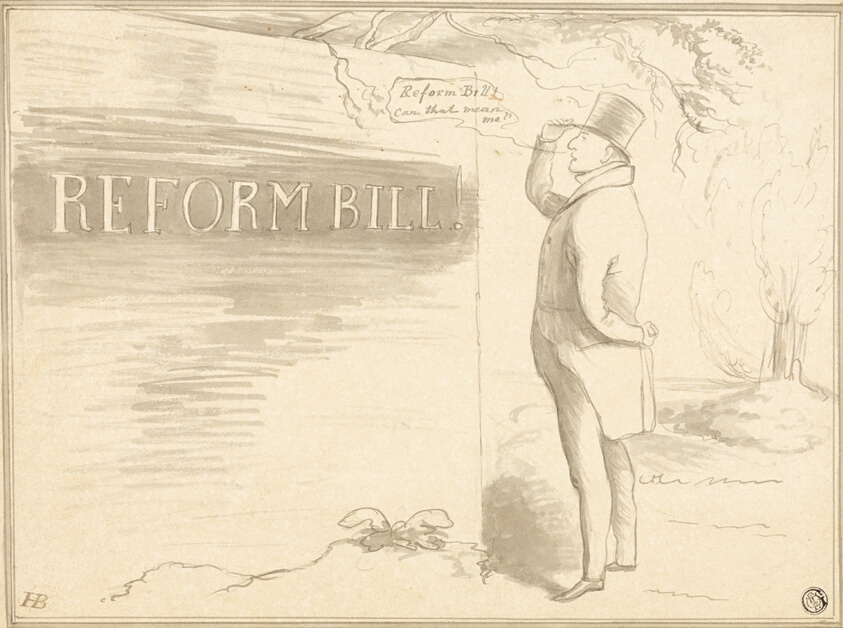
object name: Drawing and Watercolor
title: The Handwriting on the Wall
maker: Attributed to or after John Doyle; Irish, 1797-1868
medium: Brush and gray wash, with pen and gray ink over graphite, on cream wove paper laid down on tan board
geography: Ireland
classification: ink or chalk wash; drawings (visual works); prints and drawing